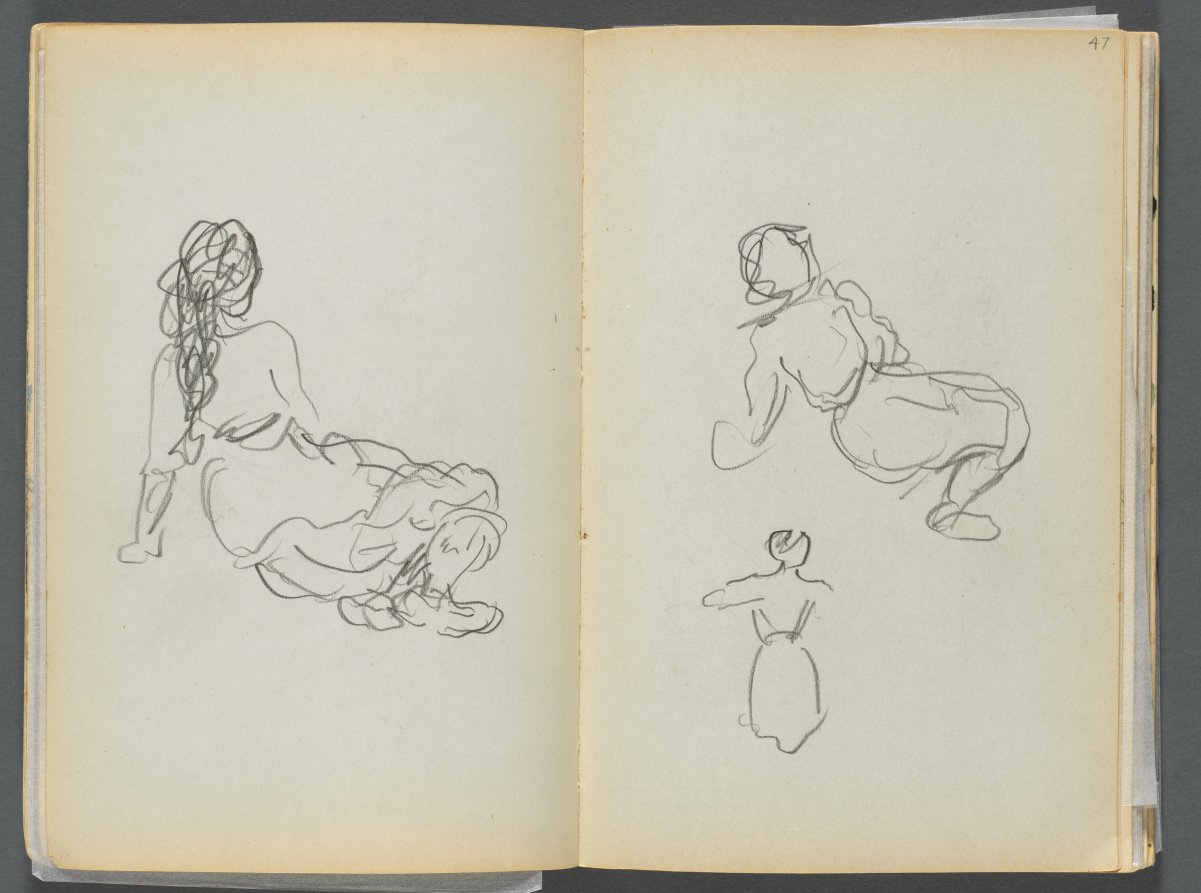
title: Sketchbook- The Granite Shore Hotel, Rockport, page 046 & 47: Seated Figures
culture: America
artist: Maurice Prendergast (American, born Newfoundland [now Canada], 1858–1924)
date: 1905–10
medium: graphite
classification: Bound Volume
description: This sketchbook contains 72 pages of pencil drawings and 9 watercolors of Cape Ann. On the inside of the cover Prendergast wrote the address of the Granite Shore Hotel in Rockport, Massachusetts.